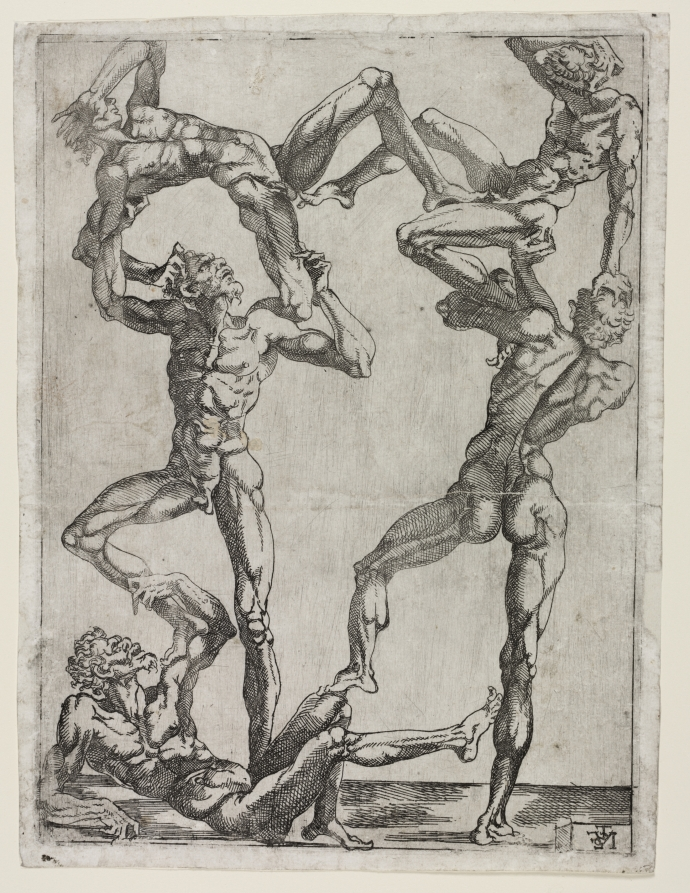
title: Pyramid of Five Men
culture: France, 16th century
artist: Juste de Juste (French, 1505–1559)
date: about 1450s-60s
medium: etching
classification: Print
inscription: Monogram in plate, lower right: IUSTE or Juste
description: Although almost nothing is known about Juste de Juste, he was probably among a circle of artists working at Fontainebleau in France in the 1540s. This eccentric composition seems to reference the twisting, turning, and balancing bodies found on the Sistine Chapel ceiling as well as the muscular nude body types associated with Michelangelo. However, the composition itself is a unique invention not derived from any specific part of the ceiling or indeed from life studies.